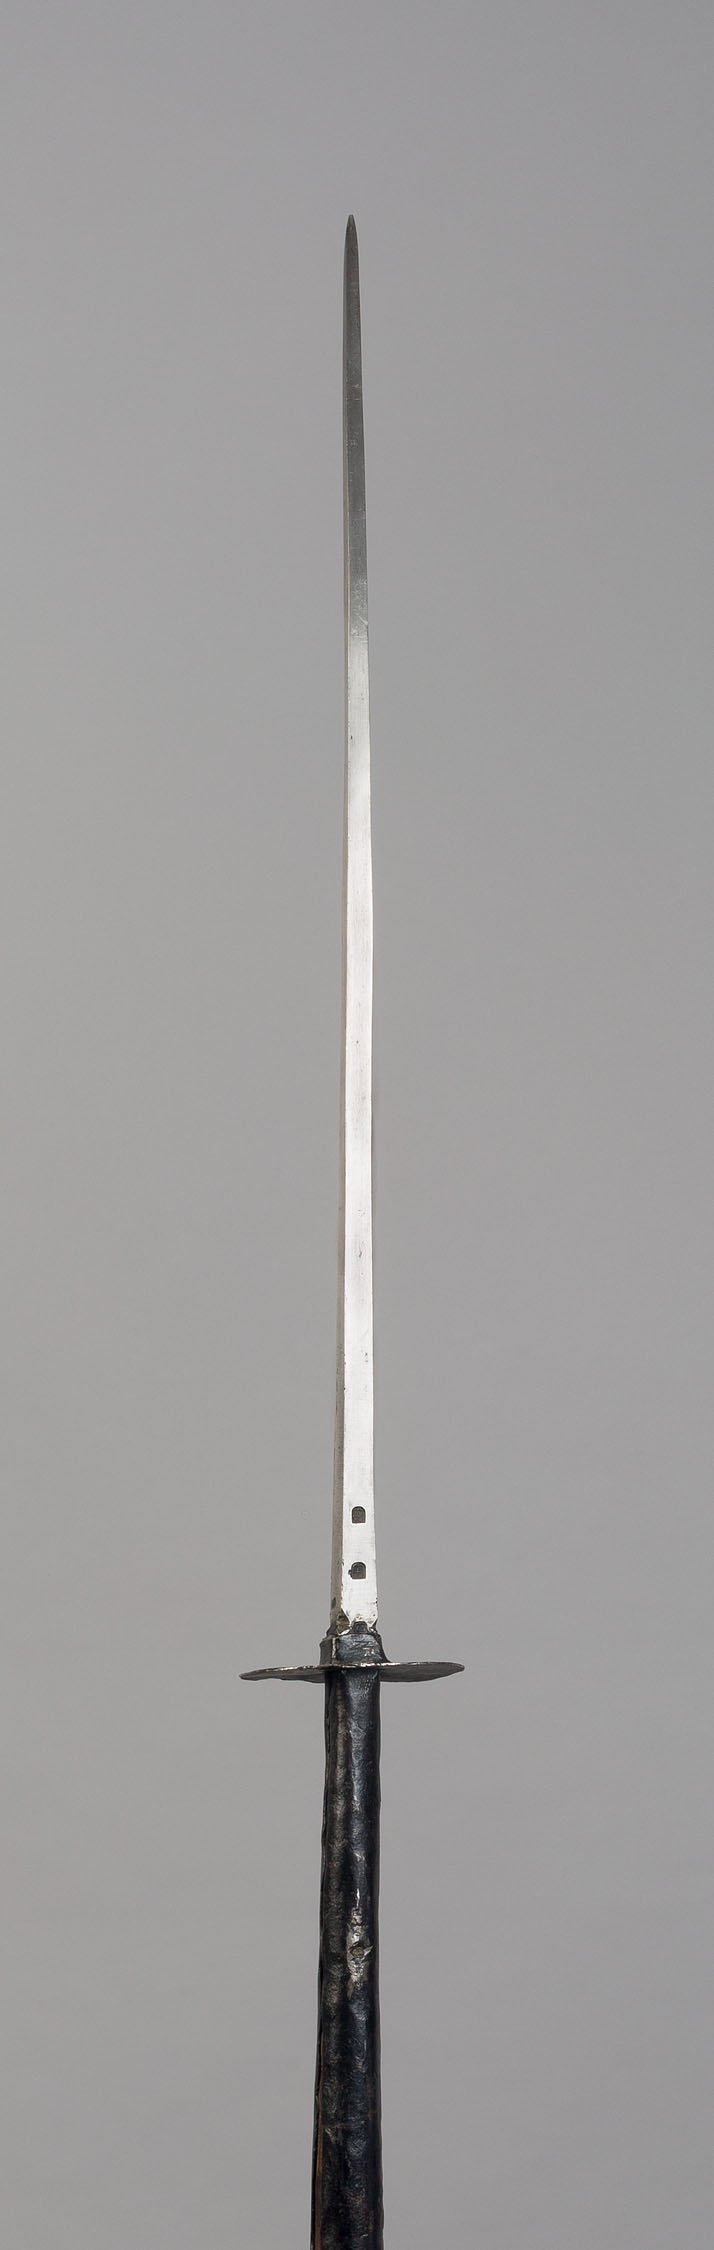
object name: Arms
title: Ahlspiess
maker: German or Austrian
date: 1480-1500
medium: Steel and wood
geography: Austria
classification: edged weapon-staff; arms; arms and armor